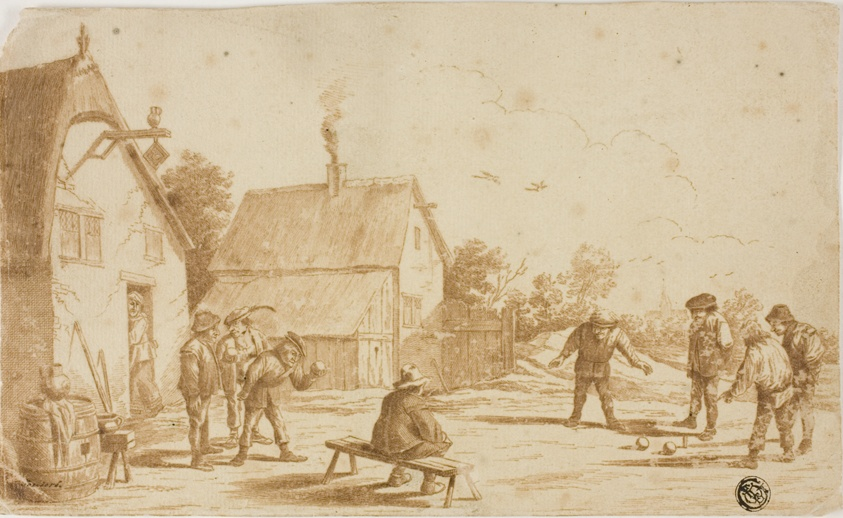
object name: Drawing and Watercolor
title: Men Playing Boules Outside Tavern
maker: After David Teniers the Younger; Flemish, 1610-1690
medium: Pen and brown ink, on cream laid paper, laid down on pink wove paper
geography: Flanders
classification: pen and ink drawings; drawings (visual works); prints and drawing